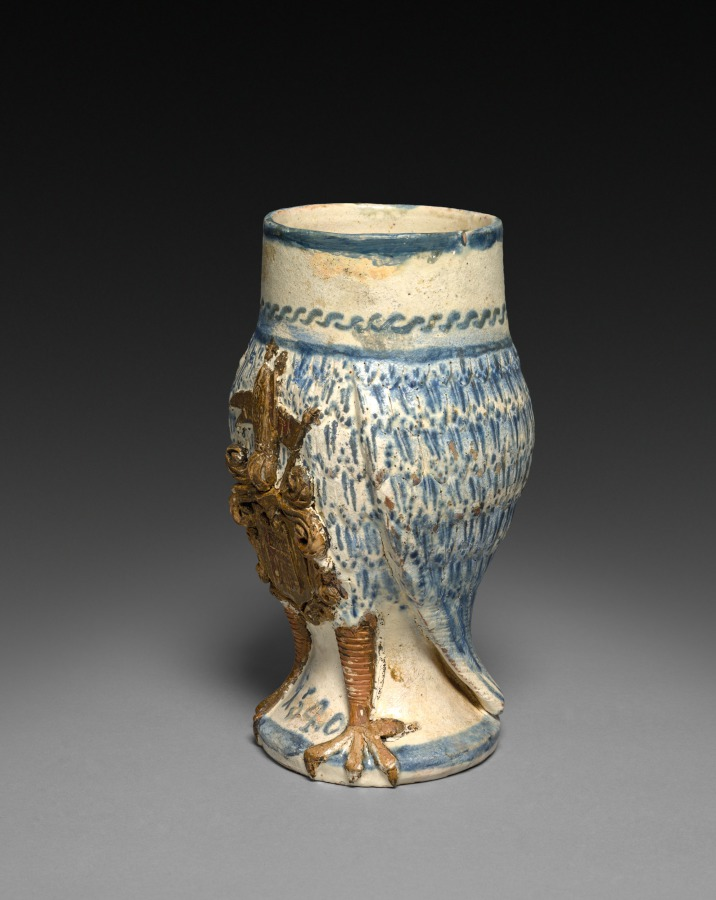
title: Owl (body)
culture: Southern Germany, 16th century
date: 1540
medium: faience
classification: Ceramic